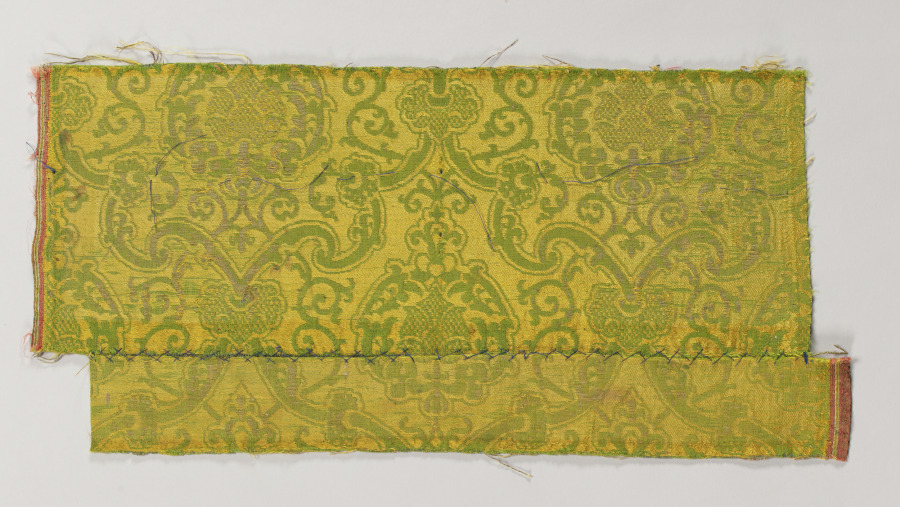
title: Length of Fabric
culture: Italy or Spain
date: 1500s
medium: silk and linen: brocade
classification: Textile